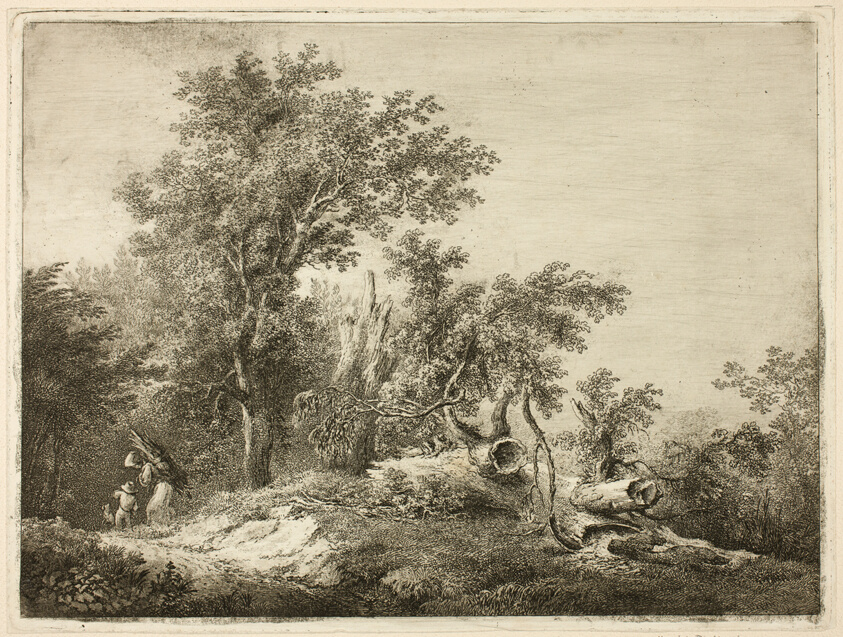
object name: Print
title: The Fallen Tree Trunk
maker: Martin von Molitor (Austrian, 1759-1812)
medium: Etching on paper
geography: Austria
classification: etching; print; prints and drawing